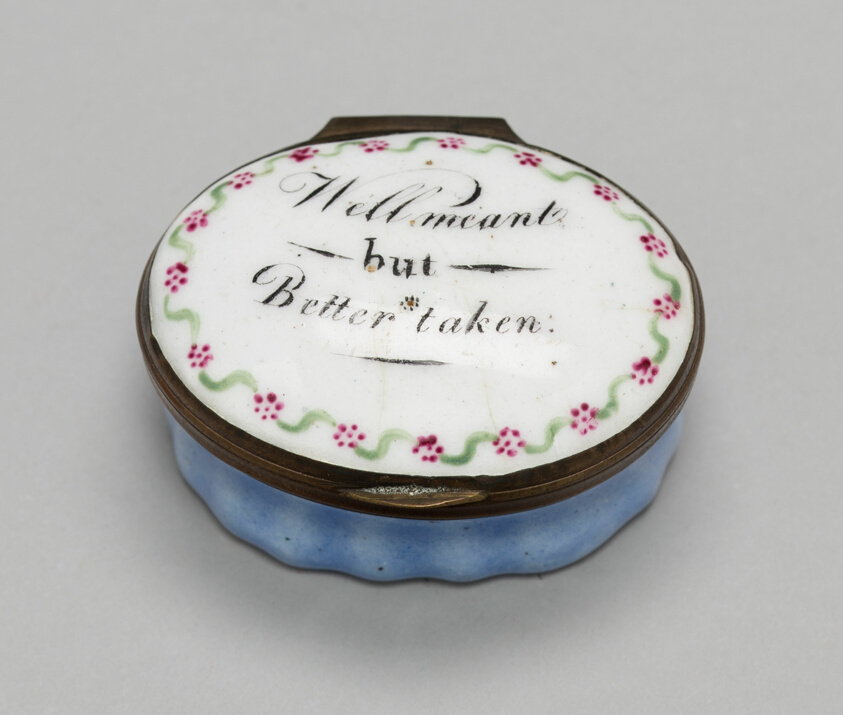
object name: Metalwork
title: Box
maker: Bilston, England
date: 1770/90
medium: Polychrome enamel on copper with metal mounts and mirror glass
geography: Bilston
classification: enamel; metalwork